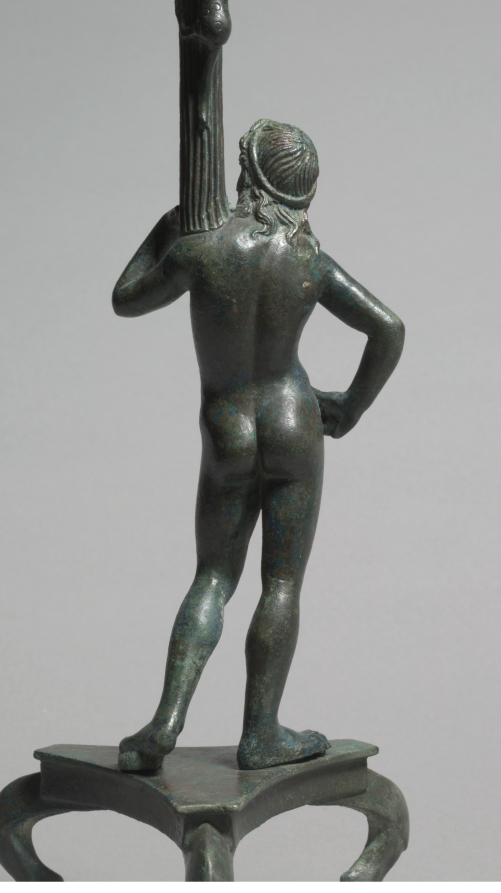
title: Incense Burner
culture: Etruscan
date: 100s BCE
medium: bronze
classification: Metalwork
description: Both elaborate and functional, the Etruscan thymiaterion, or incense burner, typically comprises at least three main parts—tripod stand, shaft, and, at the top, a shallow bowl for incense. Often, a figural support is incorporated, here in the form of a youthful male nude, perhaps the wine god Dionysos. Below him, the tripod stand features cloven hoofs, while above him a spotted cat or panther climbs toward a rooster or other crested bird. Holes in each corner of the square upper plate likely held additional animals or other ornaments.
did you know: The circular depression on the top of this object likely held incense.